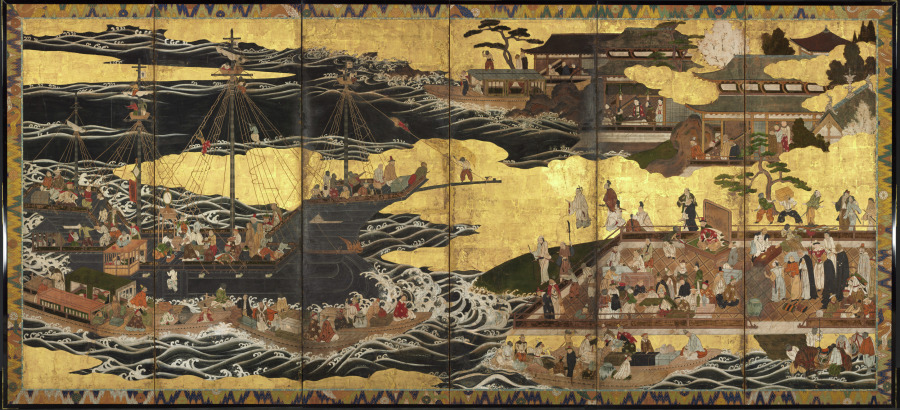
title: Arrival of the "Southern Barbarians"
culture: Japan, Momoyama period (1573–1615)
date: c. 1600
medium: One of a pair of six-panel folding screens; ink, color, and gold on paper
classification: Painting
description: This screen and its corresponding screen show Portuguese merchants arriving in Japan, having crossed the oceans in their large ship with a multinational crew. The Portuguese were known in Japan as the “Southern Barbarians” because they arrived from the south and their customs and manners were unfamiliar to the Japanese, who had not encountered anyone from Europe until their first appearance in 1543. In 1639, the Portuguese were forced out of Japan, mainly owing to internal difficulties caused by their Catholic missionaries, but they were a major conduit for both objects and ideas from Europe for nearly 100 years.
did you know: Europeans were called "Southern Barbarians" because their ships arrived in Japan from the south.